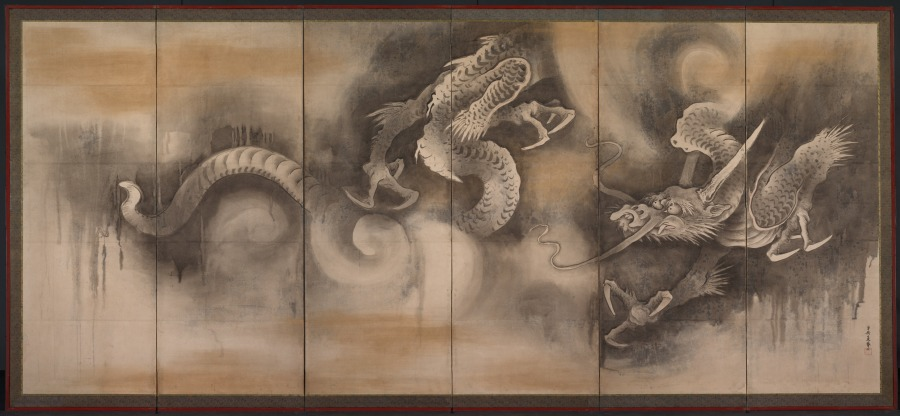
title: Dragon and Tiger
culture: Japan, Edo period (1615–1868)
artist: attributed to Soga Nichokuan (Japanese)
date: early to mid-1600s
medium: pair of six-panel folding screens; ink, slight color, gold, and silver on paper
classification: Painting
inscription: Signed: Soga Chokuan II (Soga Chokuan ni). Sealed: Hoin (right), Soga Chokuan Hoin (three seals at left)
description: A tiger looks upon a waterfall as it prowls out of a bamboo grove, and a dragon dives through clouds on the right. Tiger and dragon are traditional symbols of the balancing forces in the world, yin (the feminine aspect) and yang (the masculine aspect). This painting has a signature and seals, identifying it as a work by Soga Nichokuan, a painter thought to be from Sakai (near Osaka), and known primarily for his representations of hawk-eagles (kumataka).